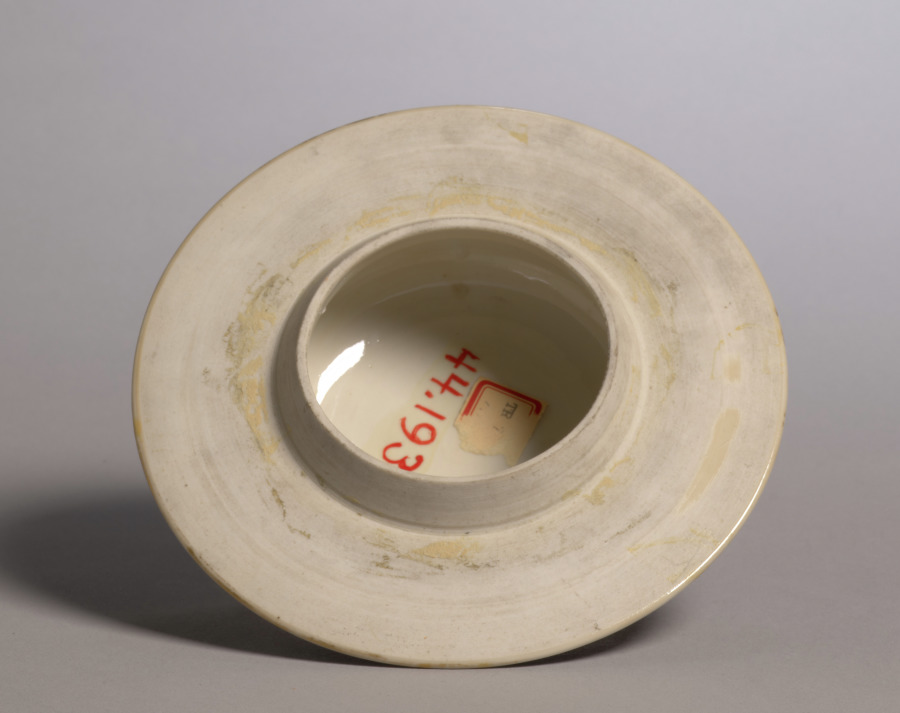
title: Cover for a Vase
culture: China, Chinese Export, 18th century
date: c. 1770–80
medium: porcelain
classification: Ceramic